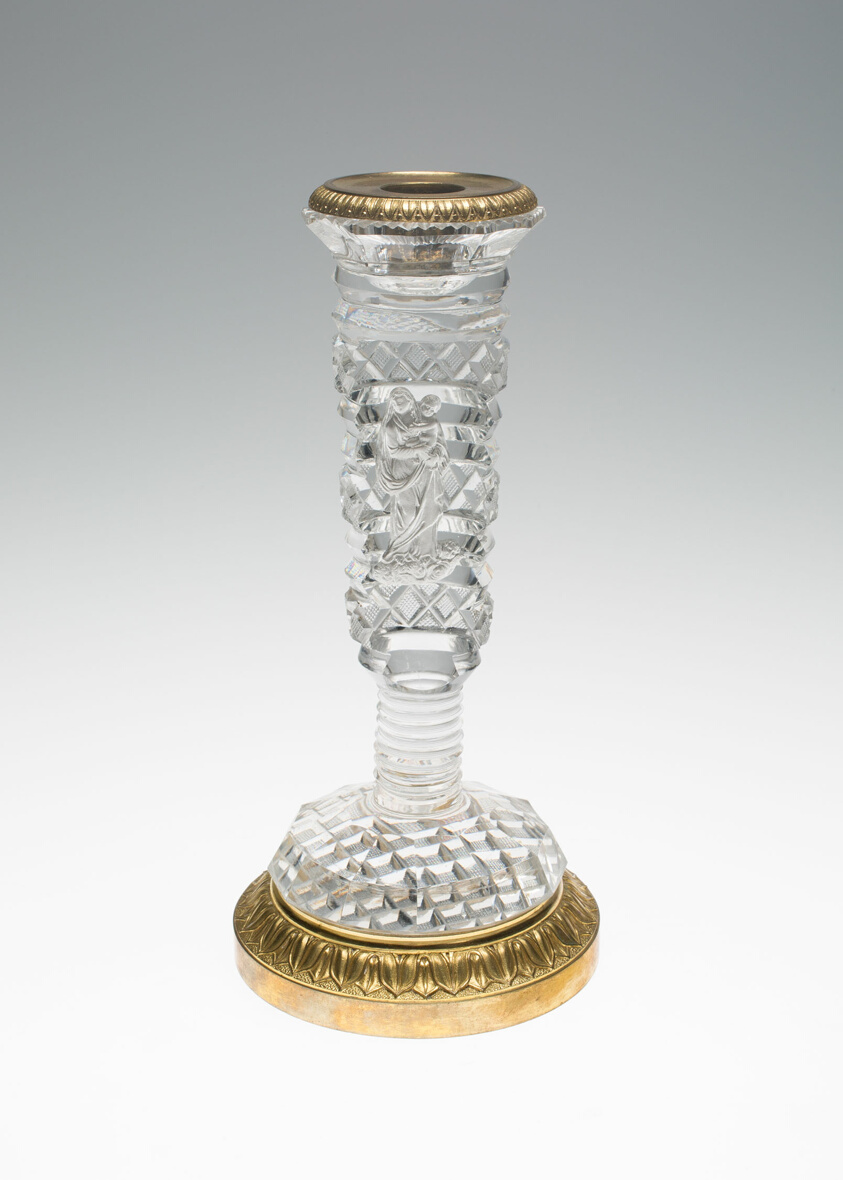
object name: Glass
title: Candlestick with Madonna and Child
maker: Bohemia, Czech Republic; Harrachov Glassworks (founded 1831)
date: c. 1835/40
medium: Glass with gilt bronze mounts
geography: Bohemia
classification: candleholder - candlestick; candleholder; glass; european decorative arts